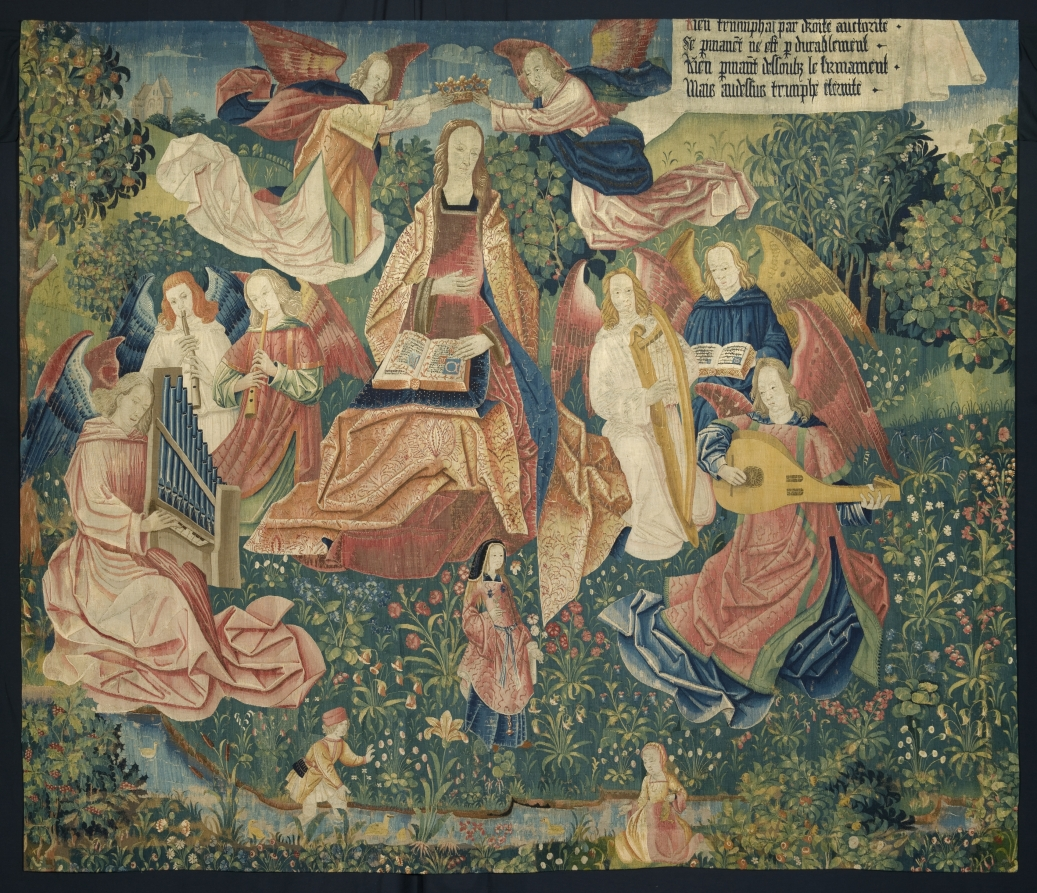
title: The Triumph of Eternity (from Chateau de Chaumont set)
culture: France, Lyon(?), early 16th century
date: 1512–15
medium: silk and wool; tapestry weave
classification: Tapestry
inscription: French verse in Gothic letters translates as follows: "Nothing triumphs by right authority, Unless it be conducted by Eternity. Nothing is permanent beneath the firmament, But above us triumphs Eternity."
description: The Triumph of Eternity is represented by the Coronation of the Virgin. Dressed in crimson velvet with an opulent brocaded velvet shawl, the Virgin is seated in the center as two angels hold a crown over her head. Five musical angels surround her playing an organ, recorder, straight cornetto, harp, and lute, while another sings from an open music book. The scenes in the set display a conservative style in which the figures are placed in shallow landscapes, thereby ignoring pictorial innovations for depicting space and mass. The verse in Old French at the top states: Nothing triumphing by due authority Remains permanent and durable. Nothing is permanent under the heavens, But above, eternity triumphs.